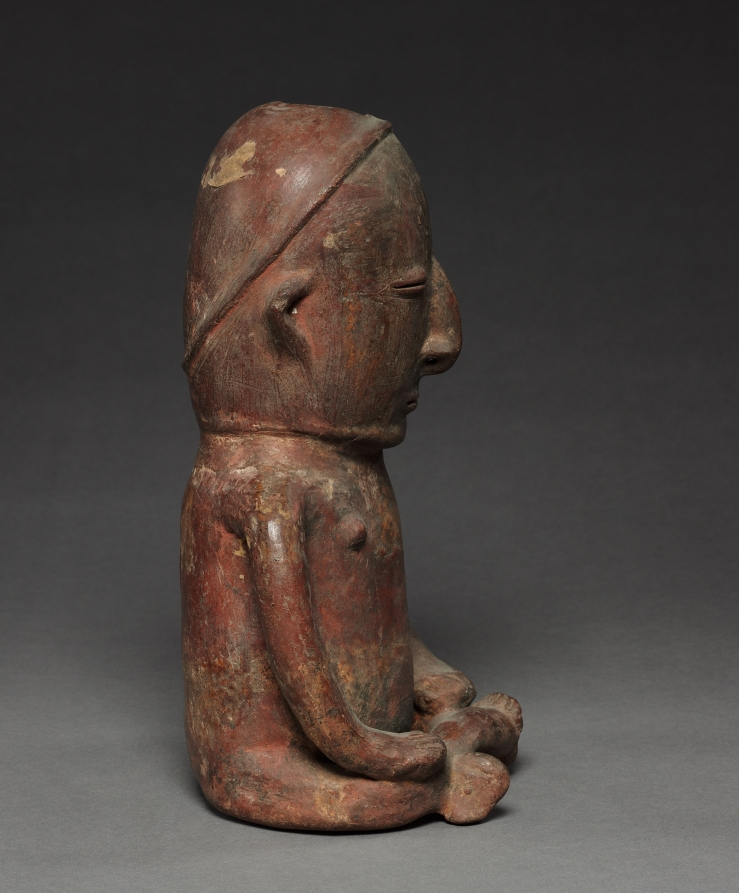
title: Seated Figure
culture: Colombia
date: before 1921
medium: red ware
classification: Ceramic